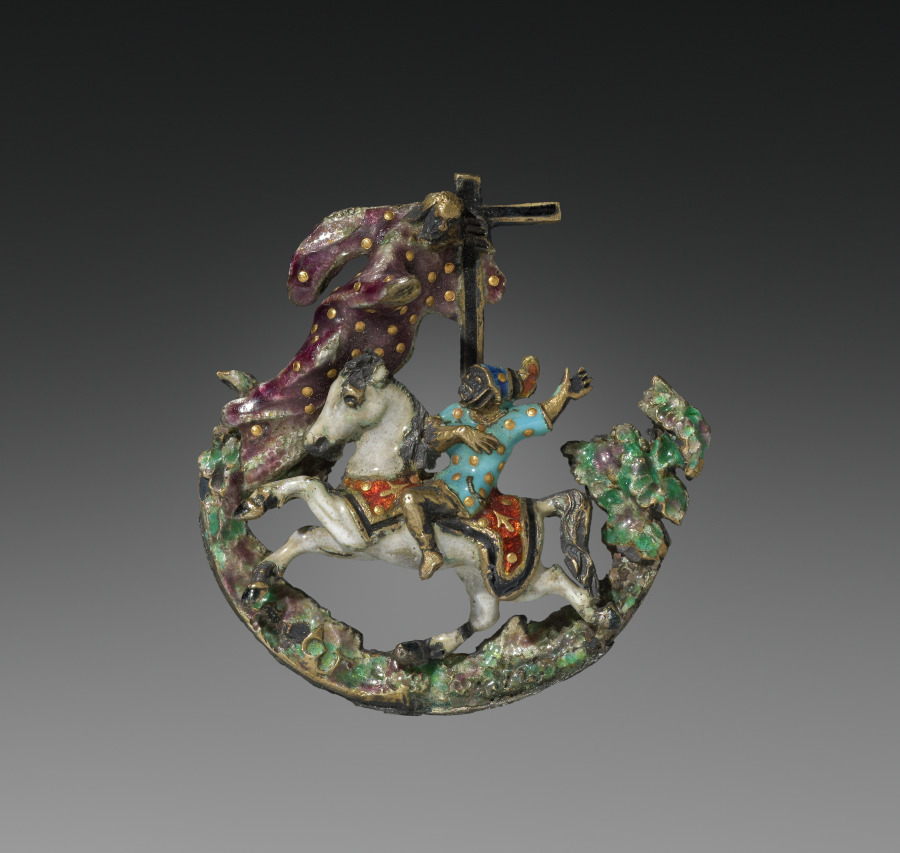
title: Brooch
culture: Central Europe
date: 1700s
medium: enameled metal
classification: Jewelry